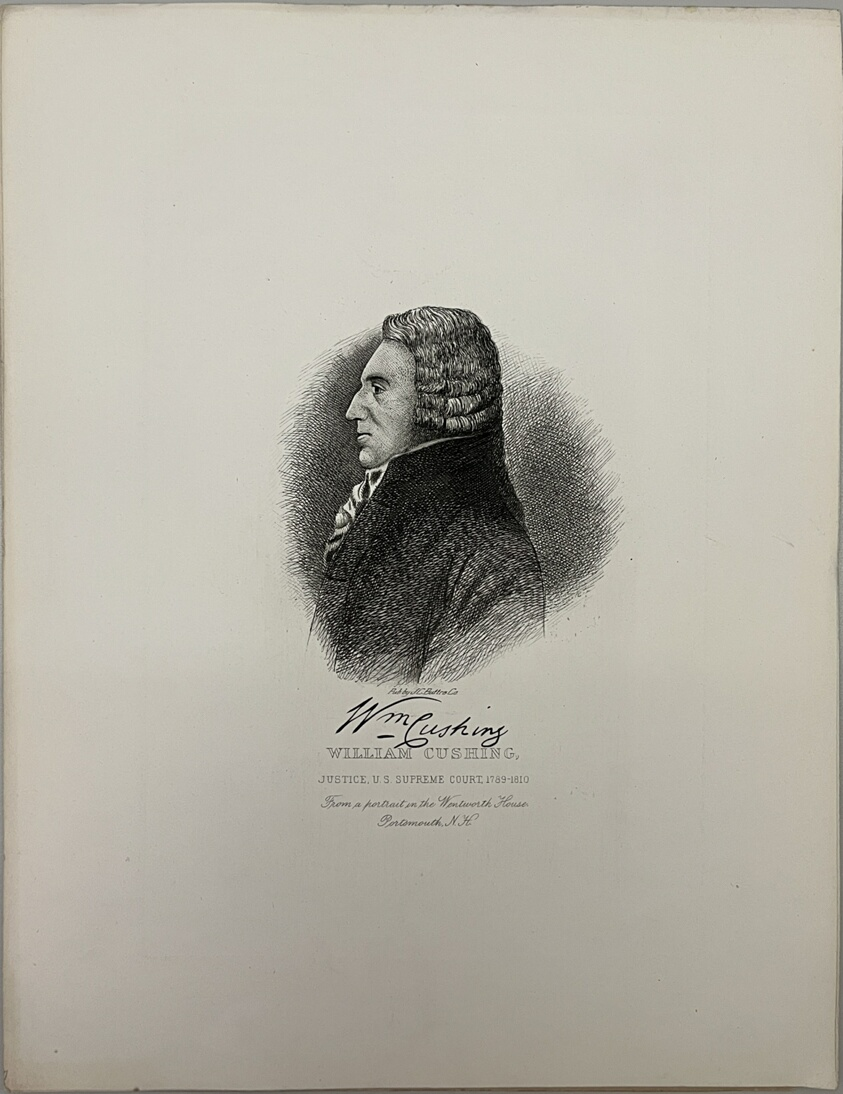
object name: Print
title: William Cushing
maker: John Chester Buttre (American, 1821-1893)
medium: Etching on paper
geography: United States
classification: reproduction; print; prints and drawing